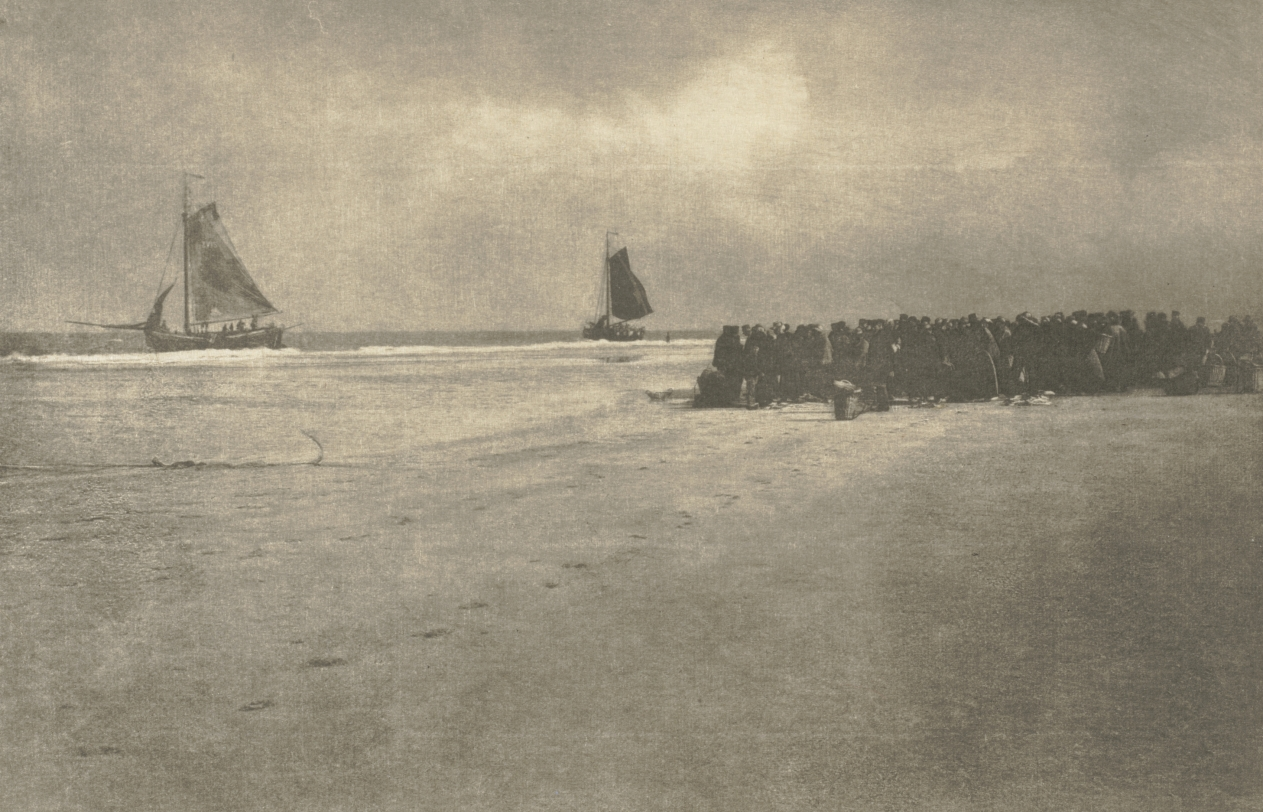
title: Camera Work: On a Dutch Shore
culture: England, 20th century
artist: J. Craig Annan (British, 1864–1946)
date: 1904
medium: photogravure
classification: Bound Volume